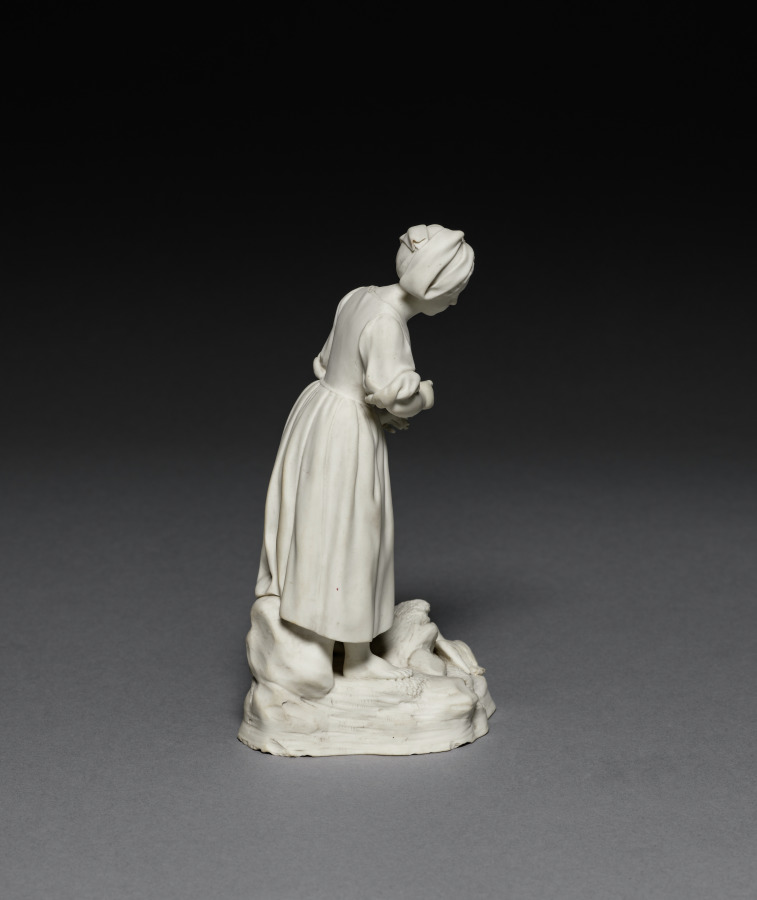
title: Curiosity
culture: France, Lunéville, 18th century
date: c. 1770–1775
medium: pipe clay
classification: Ceramic